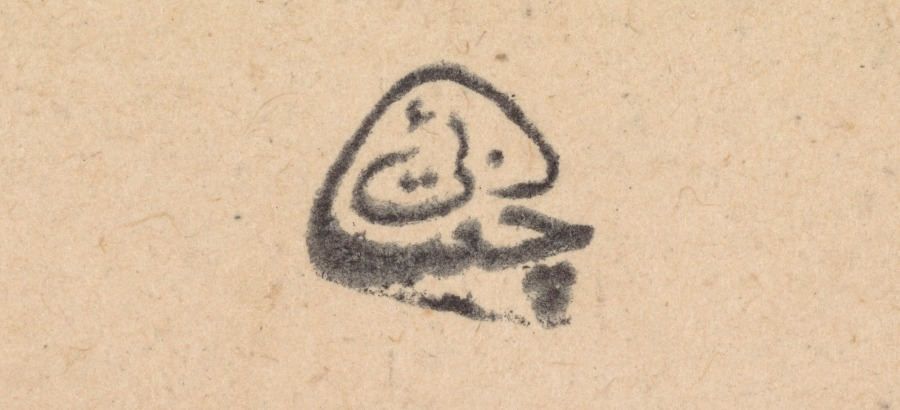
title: Portrait of Raja Jagat Singh of Nurpur (reigned 1618–46)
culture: Mughal India, Court of Jahangir (reigned 1605 - 27), possibly Lahore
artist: attributed to Bichitr (Indian, active c. 1615–50)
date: probably 1619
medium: Gum tempera and gold on paper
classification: Painting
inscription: ascription in lower right corner: amal - i bandieh dargah Bichitr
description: Jagat Singh was a prince from a small kingdom in the western Himalayan foothills who grew up at the imperial Mughal court of Jahangir and his queen Nur Jahan. He was given the title of prince in 1619, and this painting may commemorate that event. Very few nobles from the hill states had positions at the Mughal court at this time, so his portrait is a rare imperial Mughal painting. The emperor and his favorite wife frequently visited Nurpur, named “City of Light” in their honor, to hunt and relax, and Prince Jagat Singh was a favorite of the queen. She interceded on his behalf in 1624, when he joined a rebellion to dethrone her husband.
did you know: Jagat Singh, shown in this miniature, was a favorite of the Mughal queen.